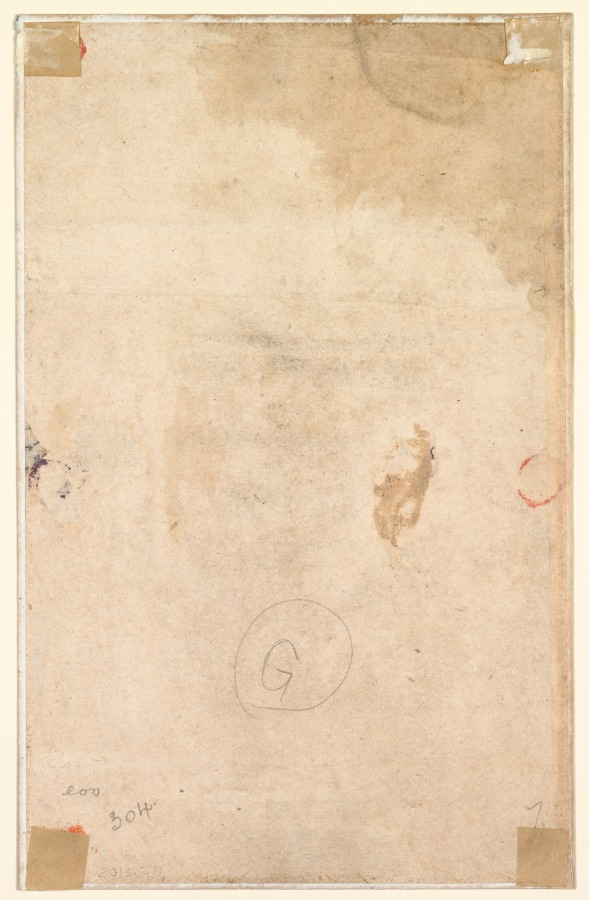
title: A princess with attendants on a terrace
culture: India, Hyderabad, Deccan, 18th century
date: c. 1720–1730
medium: Gum tempera and gold on paper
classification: Painting